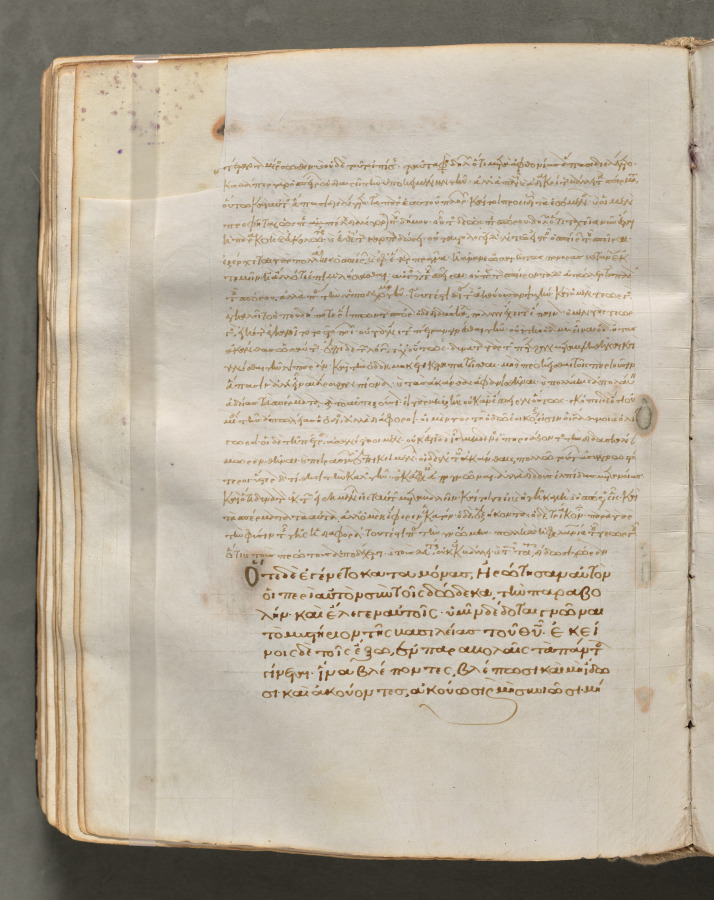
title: Text, folio 143 (verso), from a Gospel Book with Commentaries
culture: Byzantium, Constantinople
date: c. 1000–1100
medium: ink, tempera, and gold on vellum; leather binding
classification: Bound Volume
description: Each of the four gospels in this book opens on a page with brilliantly illuminated borders depicting the author of the text as well as birds-principally peacocks, symbols of the immortality of the soul-and fountains, representing the fountain of life and the salvation of the soul. This volume consists of 428 leaves with texts in Greek. Its level of sophistication suggests that it was probably written and decorated in a monastery in Constantinople.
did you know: Gospel Books were carried in procession through Byzantine churches.